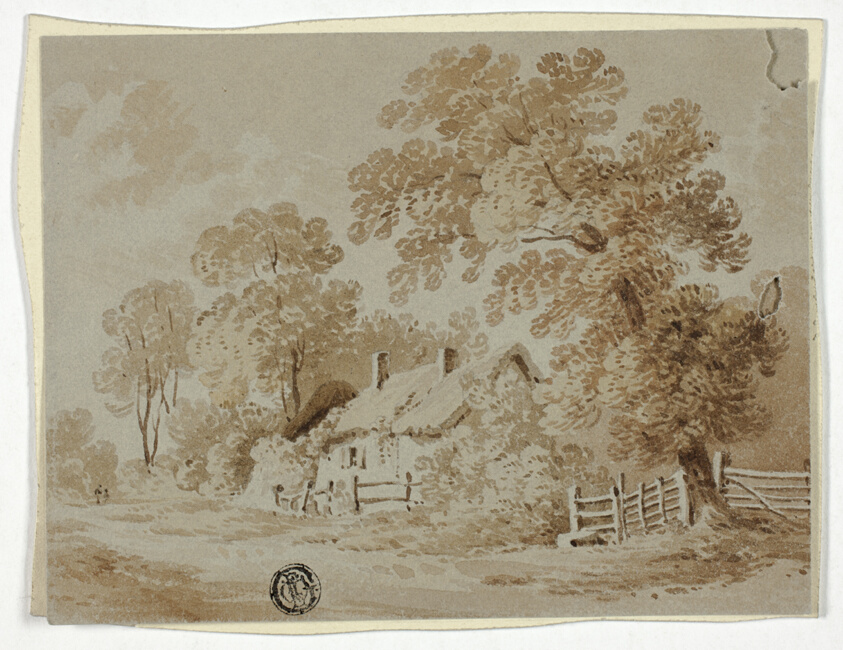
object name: Drawing and Watercolor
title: At Crossington in Leicestershire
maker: F. Smith (English)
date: c. 1800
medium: Brush and brown wash, over graphite, on gray wove paper, tipped on cream card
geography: England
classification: ink or chalk wash; drawings (visual works); prints and drawing